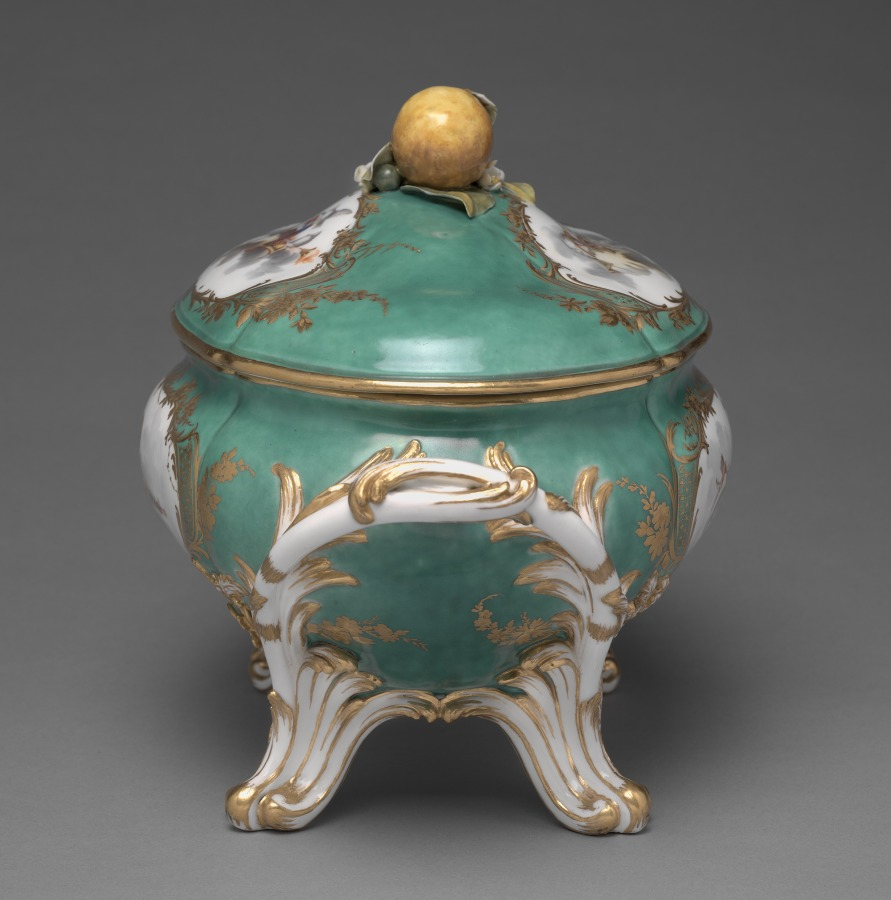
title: Covered Tureen (Terrine du roi)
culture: France, Sèvres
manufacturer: Sèvres Porcelain Factory (French, est. 1756)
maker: attributed to Charles Nicolas Dodin (French, 1734–1803)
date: 1756–57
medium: soft-paste porcelain with enamel and gilt decoration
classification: Ceramic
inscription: [Interlaced L's]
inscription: [Date letter 'D' (in cursive with a dot on either side)]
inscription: [Incised 'b']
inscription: [Incised '6']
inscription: [Inventory numbers in red enamel]: "r.u./710" [base of tureen]; "r.u./710a" [on lid]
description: This tureen’s striking green background, or fond vert, was a major advancement for the Sèvres Porcelain Factory, known for their innovation in and mastery of color. Traditionally the largest, most expensive item in an 18th-century French dinner service, this tureen was part of a porcelain dining set presented to King Frederick V of Denmark by French King Louis XV in 1758.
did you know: French King Louis XV was a great patron of the decorative arts; he acquired the Sèvres Porcelain Factory in 1759.